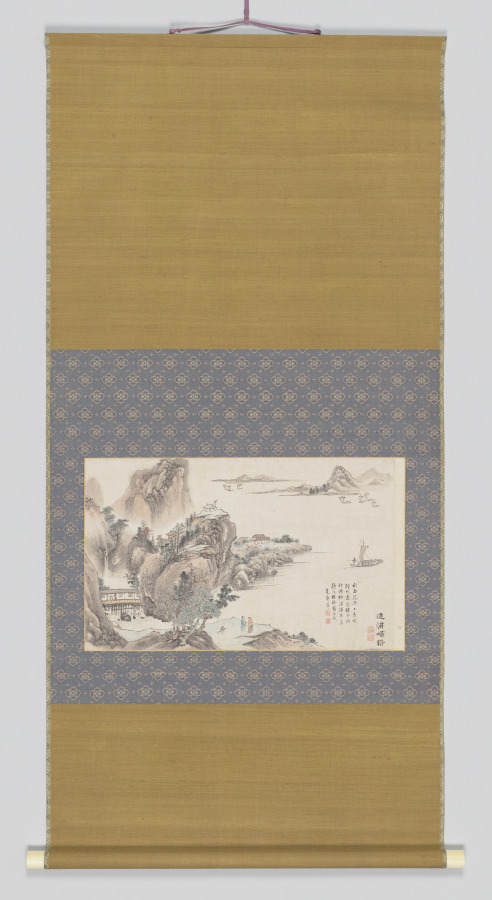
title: Returning Sails off a Distant Shores, from Eight Views of Xiao-Xiang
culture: Japan, Edo period (1615–1868)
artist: Tani Bunchō (Japanese, 1763–1841)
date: 1788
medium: album leaf remounted as a hanging scroll; ink and color on paper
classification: Painting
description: This painting was part of a set of album leaves representing the Eight Views of Xiao-Xiang, a theme originating in Chinese poetry and painting that spread to both Korea and Japan. Southern China’s Xiao-Xiang area, where the mist-covered banks of the Xiang River created a complex landscape shifting like the moods and minds of people, captured the imaginations of generations of painters and calligraphers. Inscriptions on these works suggest that they were possibly ordered by newly prominent Japanese Confucian scholars.